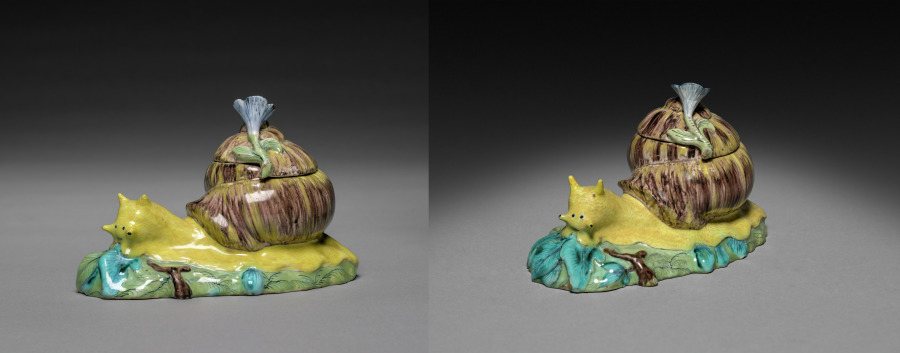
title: Pair of Covered Boxes in the Form of Snails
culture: France, 18th century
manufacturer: Strasbourg Factory (France)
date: c. 1750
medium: faience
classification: Ceramic